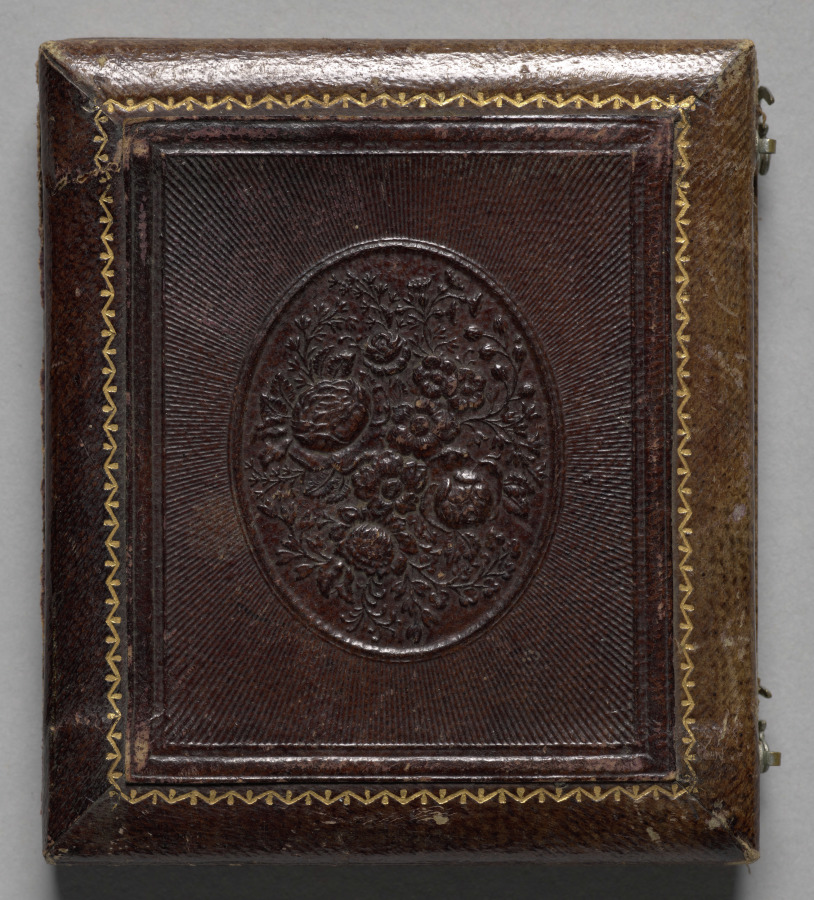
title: Hunter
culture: America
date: c. 1862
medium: daguerreotype, sixth plate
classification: Photograph